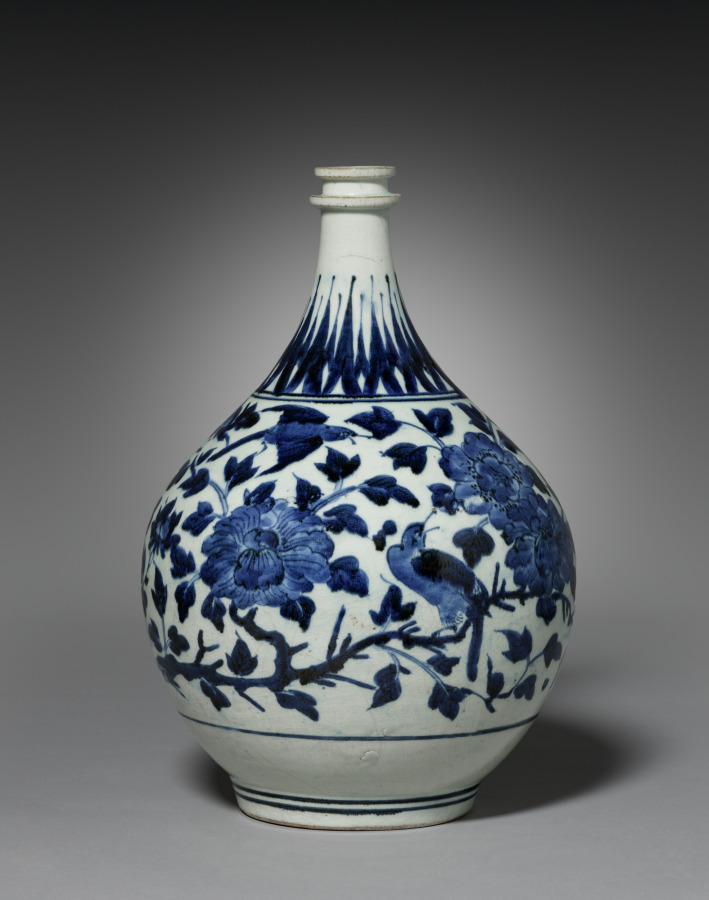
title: Medicine Bottle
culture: Japan, Edo period (1615–1868)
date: 1670s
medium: porcelain with underglaze blue decoration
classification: Ceramic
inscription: "I.C." on bottom (probably made for Joannes Camphuys, 1634–1695).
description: While inspired by medicine jars used in European pharmacies, this bottle was likely decorative. It may have been exported by the Dutch East India Company, a powerful trading company from the Netherlands. In Japan, it operated from Deshima, a man-made island in Nagasaki harbor created in 1636. The initials “I. C.” appear on the base. As the letter J was often transposed with the letter I in Europe of the 1600s, some scholars believe the bottle may have been made for Johannes Camphuys (1634–1695), who was in charge of the Dutch East India Company’s operations in Deshima in 1671.